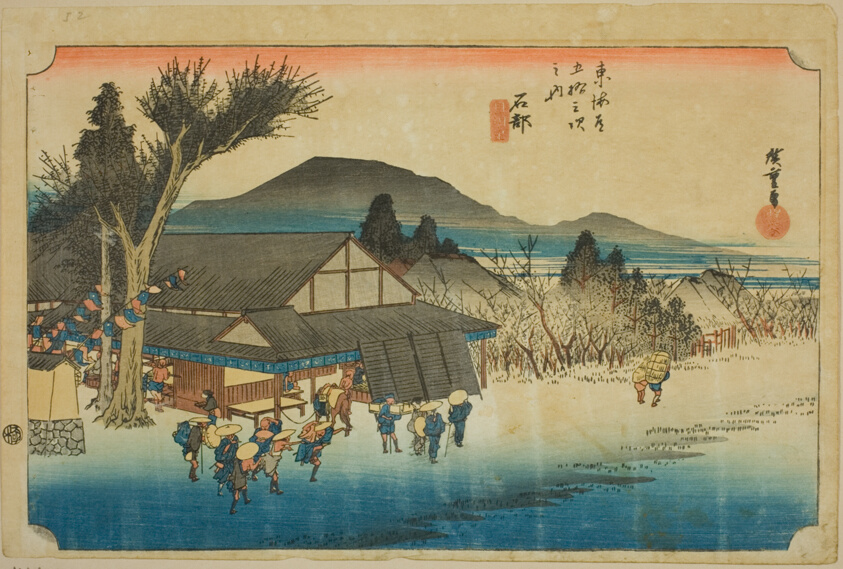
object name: Print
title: Ishibe: Megawa Village (Ishibe, Megawa no sato), from the series "Fifty-three Stations of the Tokaido (Tokaido gojusan tsugi no uchi)," also known as the Hoeido Tokaido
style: Japanese (culture or style), edo (japanese period), Japanism, East Asian, asian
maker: Utagawa Hiroshige 歌川 広重; Japanese, 1797-1858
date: c. 1833/34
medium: Color woodblock print; oban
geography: Japan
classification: woodblock print; print; asian art